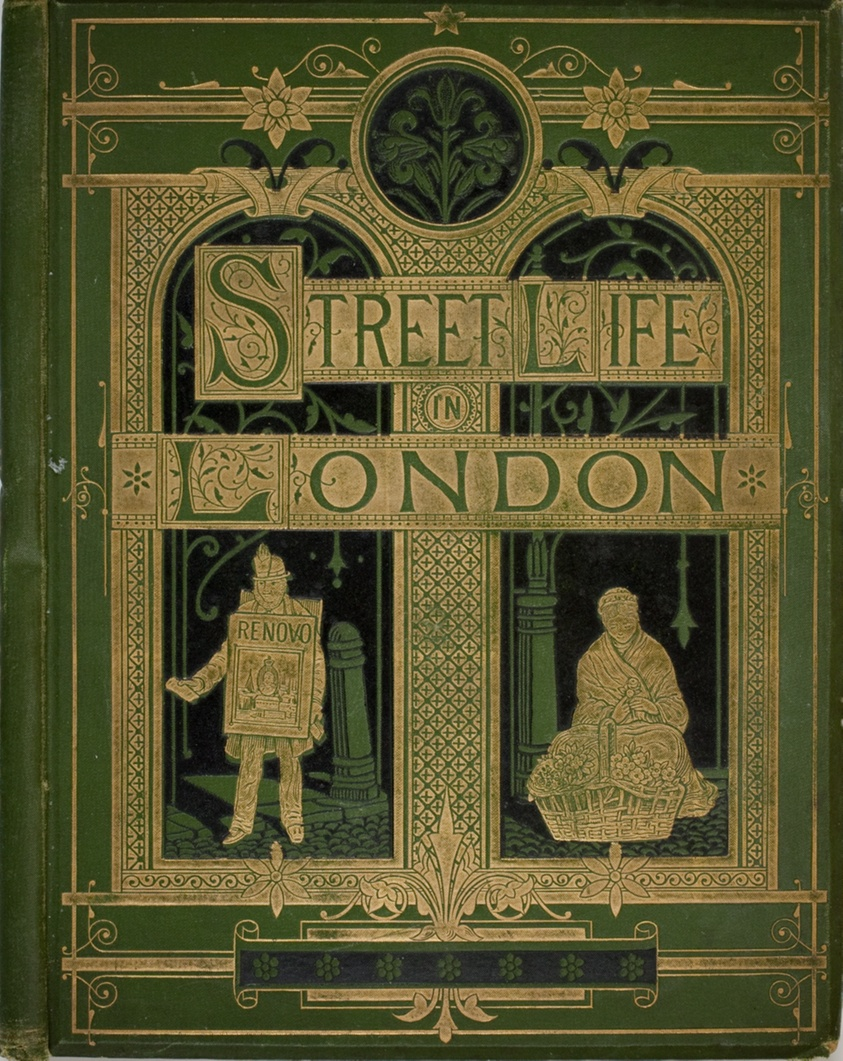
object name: Photograph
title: Street Life in London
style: 19th century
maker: John Thomson (Scottish, 1837–1921)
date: 1877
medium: Woodburytypes (19)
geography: Scotland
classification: photograph; photography